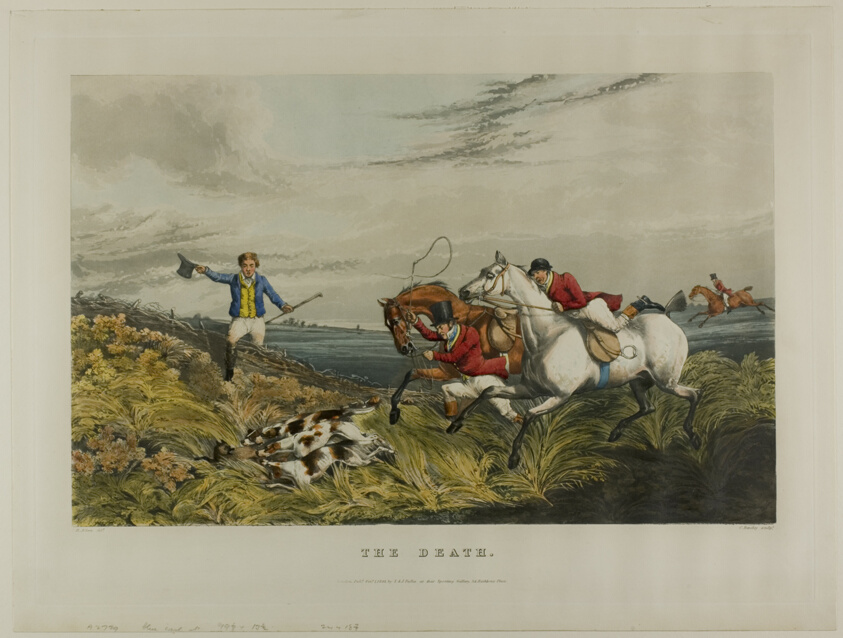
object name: Print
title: The Death, from the series Fox Hunting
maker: Charles Bentley (English, 1806-1854); after Henry Alken (English, 1785-1851); published by S. & J. Fuller (English, c.1809-1854)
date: 1828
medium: Hand-colored etching and aquatint on paper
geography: England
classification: aquatint; print; prints and drawing